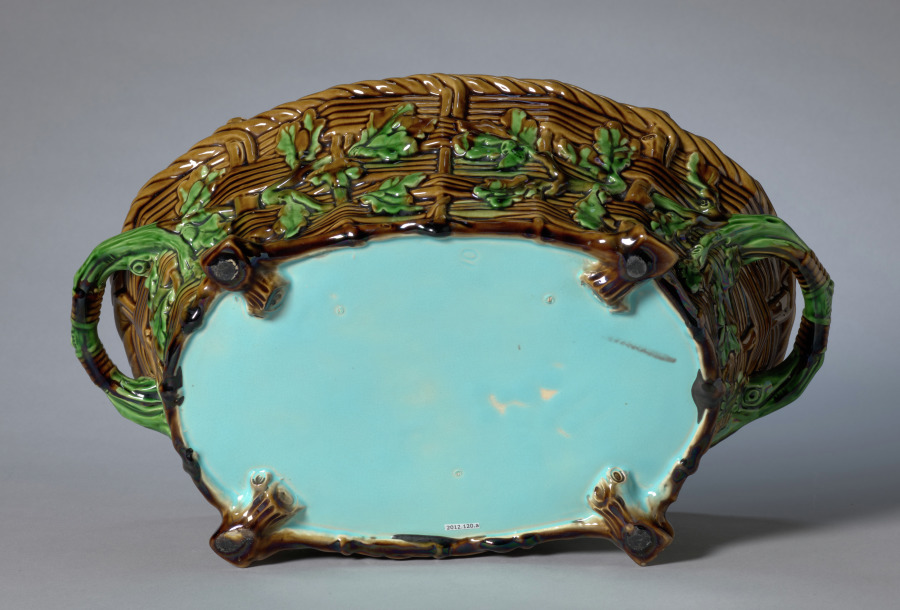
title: Game Pie Dish (Dish)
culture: England, 19th century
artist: Minton Pottery and Porcelain Factory (British)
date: c. 1860–80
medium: earthenware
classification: Ceramic